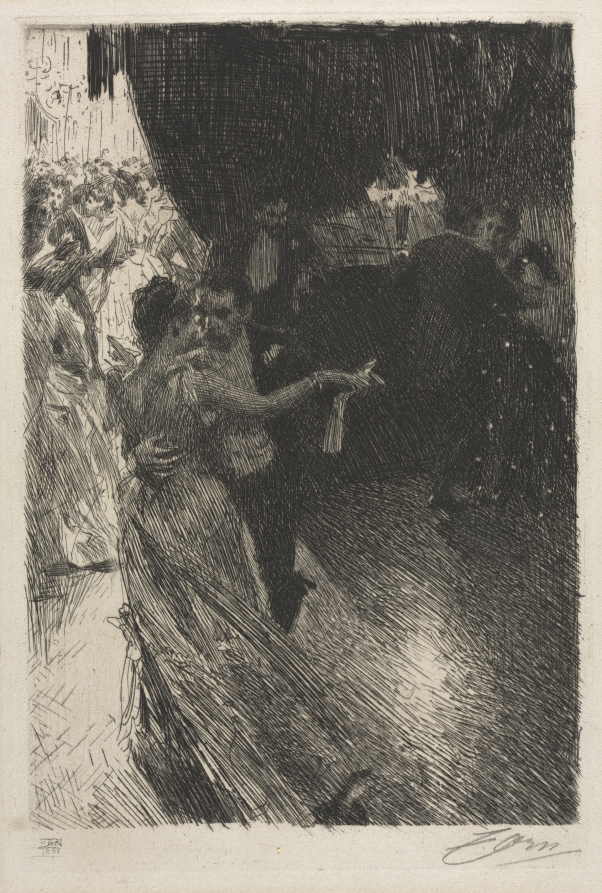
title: The Waltz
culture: Sweden, late 19th Century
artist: Anders Zorn (Swedish, 1860–1920)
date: 1891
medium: etching and drypoint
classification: Print